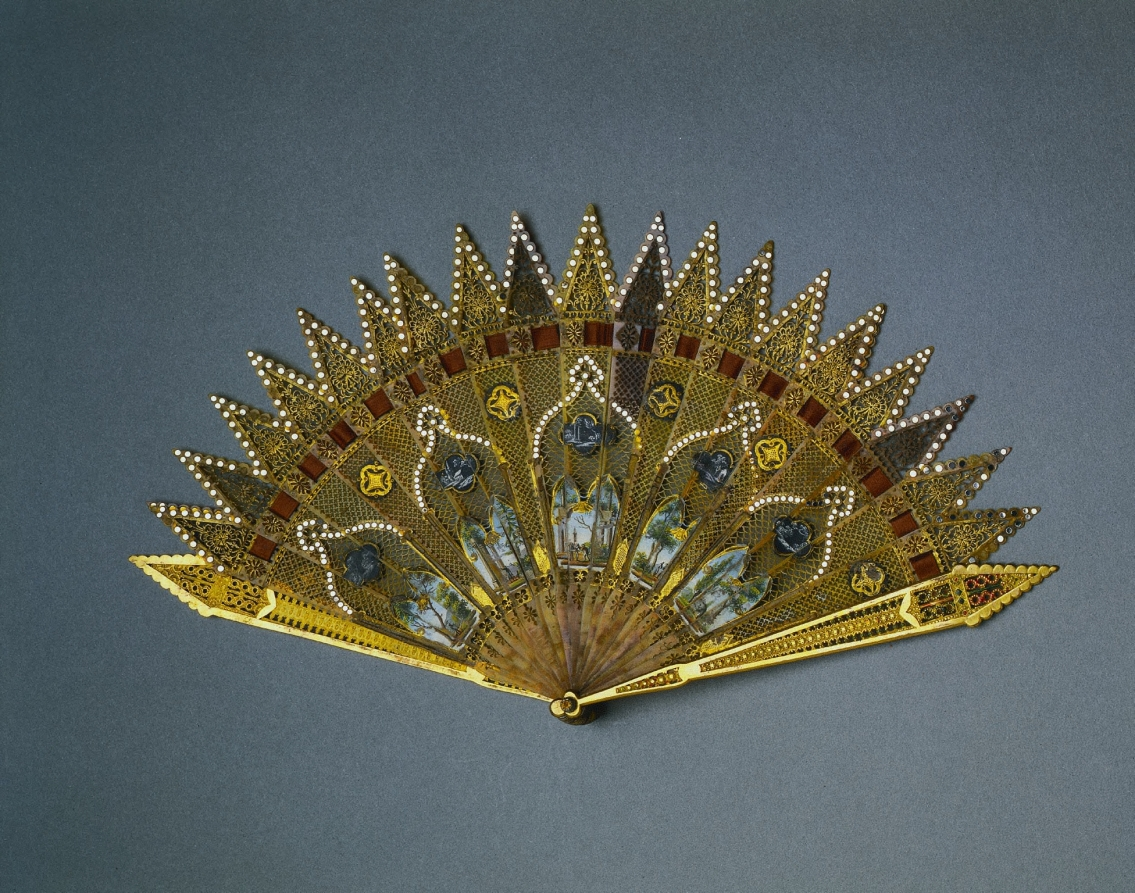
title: Brise Fan: Gothic Revival Style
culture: England (probably), 19th century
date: c. 1830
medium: gilt metal, enamel, horn, pigment, spangles, ribbon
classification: Miscellaneous